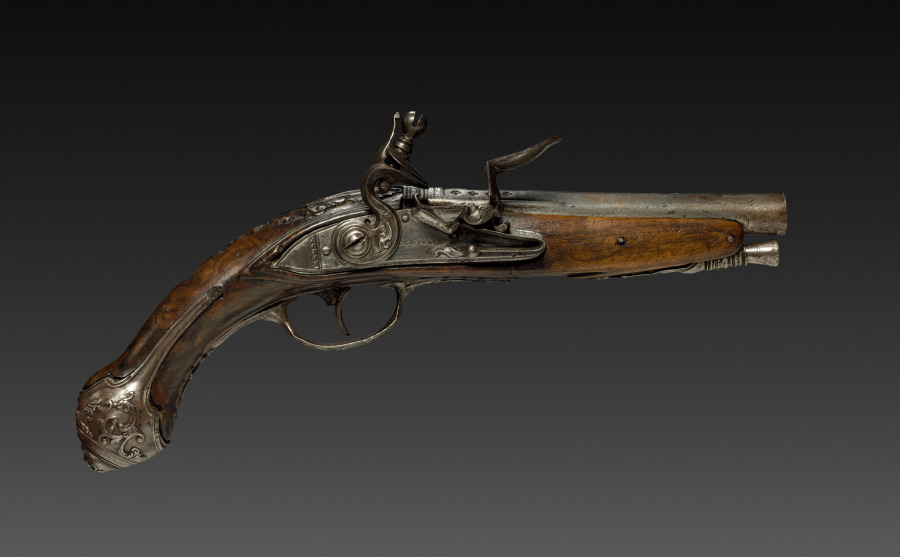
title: Flintlock Pistol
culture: Italy, Brescia, 18th century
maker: Bortolo Agazzi (Italian)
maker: Lazaro Lazarino (Italian)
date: 1700s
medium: steel with traces of gilding; walnut stock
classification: Arms and Armor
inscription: on lock: Bortolo Agazzi; on barrel: Lazaro Lazarino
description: The flintlock was the most popular style of lock in all of Europe in the mid 1600s through the 1700s except in Spain and Italy where the snaphance was more dominant. This pistol's shine comes from the gold that was applied to the steel shaft. This shiny surface is set off by the rich walnut stock. Upon close inspection, you can see areas of damage to the walnut and even a missing section of decoration on the rear of the handle.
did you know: The term flintlock is used to describe any firearm that uses a flint-striking ignition mechanism.